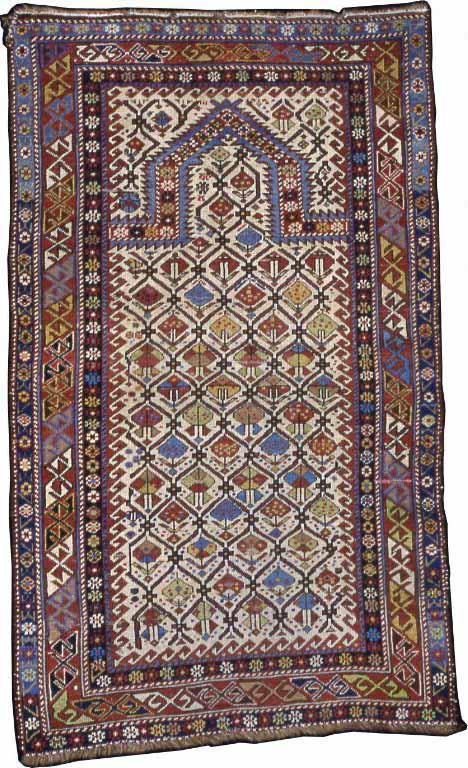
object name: Textile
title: Prayer Rug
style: kazak, caucasian, central asian, asian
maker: Turkestan, Dagestan or Shirvan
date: c. 1900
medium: Wool and cotton, plain weave with supplementary wrapping wefts forming cut pile through a technique known as "Ghiordes knots"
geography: Turkestan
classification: textile; weaving - carpet; weaving